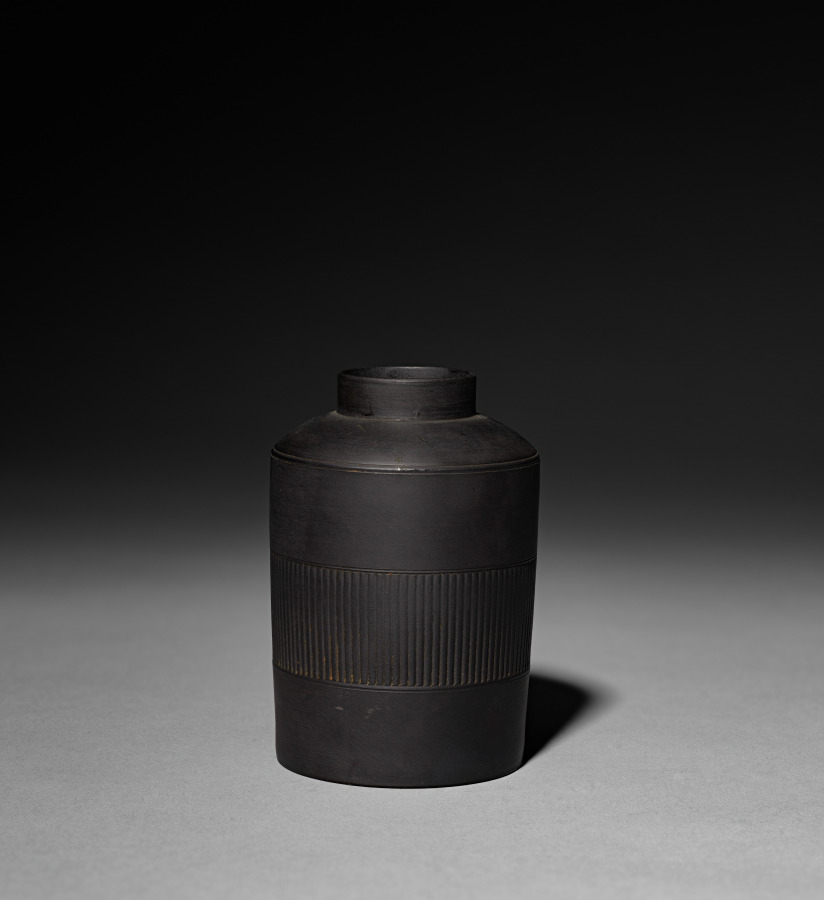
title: Tea Caddy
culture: England, Staffordshire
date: c. 1770–80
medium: Black basalt stoneware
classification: Ceramic